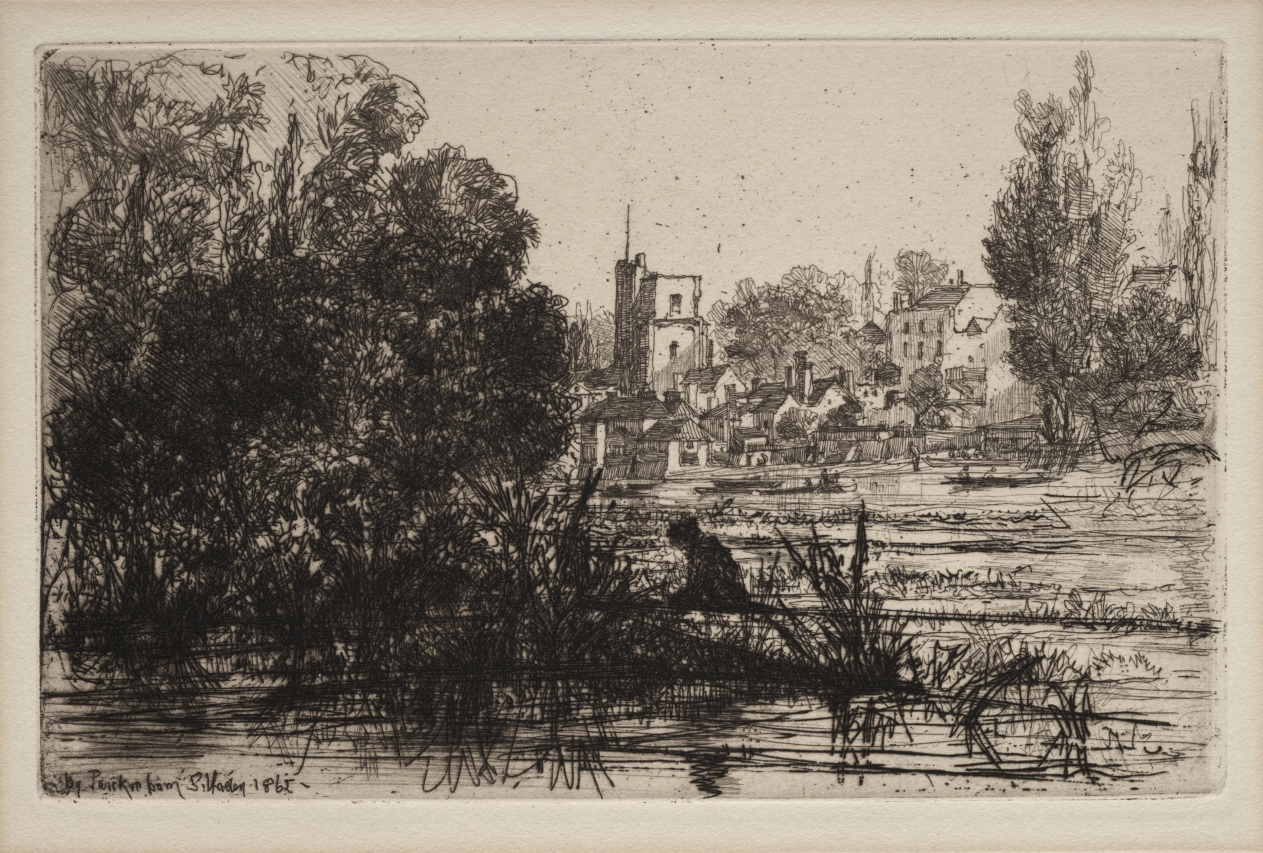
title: Twickenham Church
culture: England, 19th century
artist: Francis Seymour Haden (British, 1818–1910)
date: 1865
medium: etching and drypoint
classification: Print